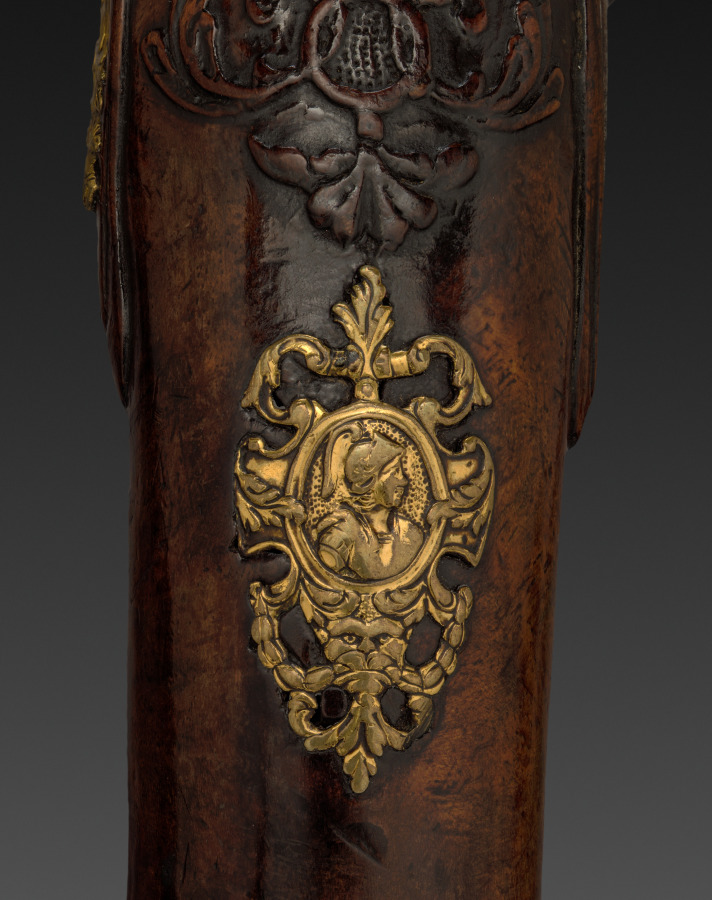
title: Flintlock Pistol (2 of 2)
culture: Franco-Flemish, Liège, early 18th Century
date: early 1700s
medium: steel with gold inlay, gilt-brass mounts; walnut burl stock; chiseled high-relief decoration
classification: Arms and Armor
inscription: on barrel: G. MASSIN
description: The barrel of this pistol is signed G. MASSIN, a gunsmith apparently working in eastern France or French-speaking Flanders, possibly the city of Liège. The exquisite ornament along the breech of the barrel is chiseled and engraved. The gilded lock-plate and mounts may be compared to the finest contemporary work in other media, such as furniture with ormolu mounts.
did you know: The flintlock ignition system was developed in the 1600s and remained the dominant system until the early 1800s.